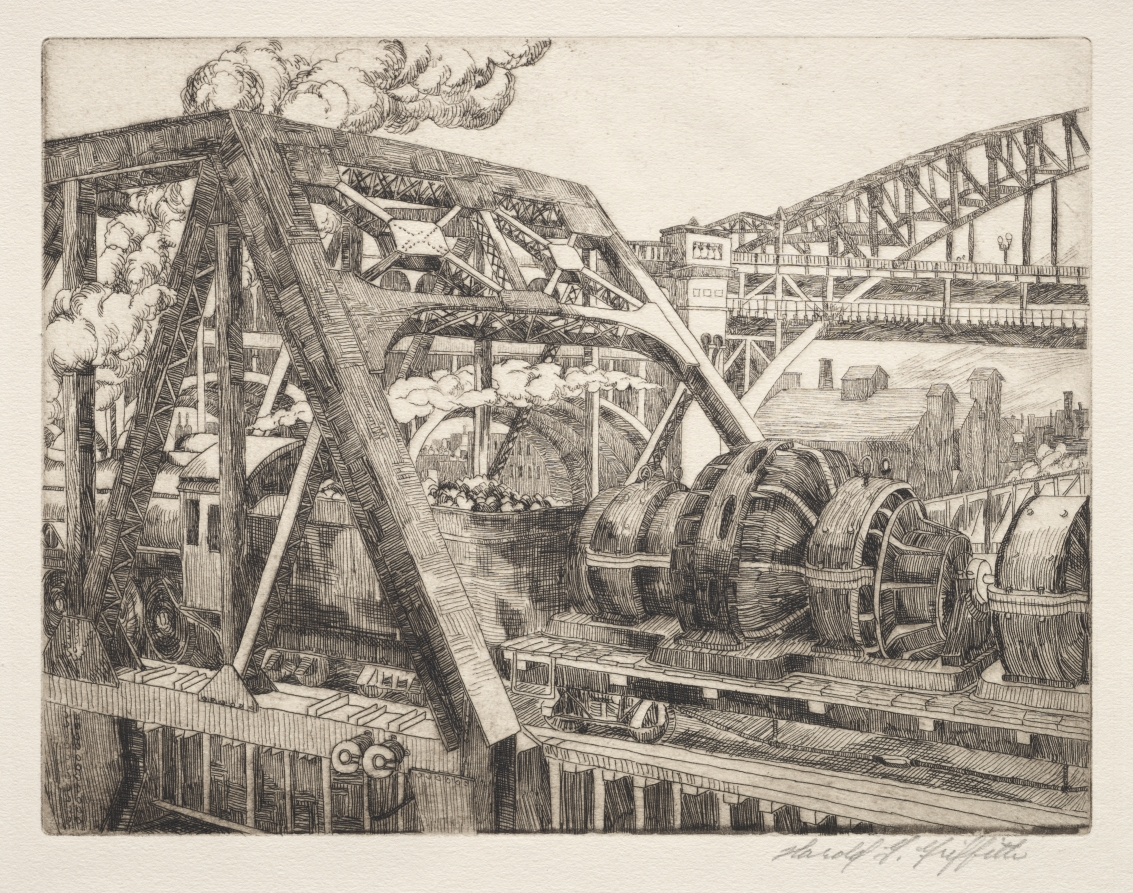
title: Industrial Cleveland: Baltimore and Ohio Railroad Lift Bridge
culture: America, Ohio, Cleveland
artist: Harold G. Griffith (American, 1904–1996)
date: 1930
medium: etching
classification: Print